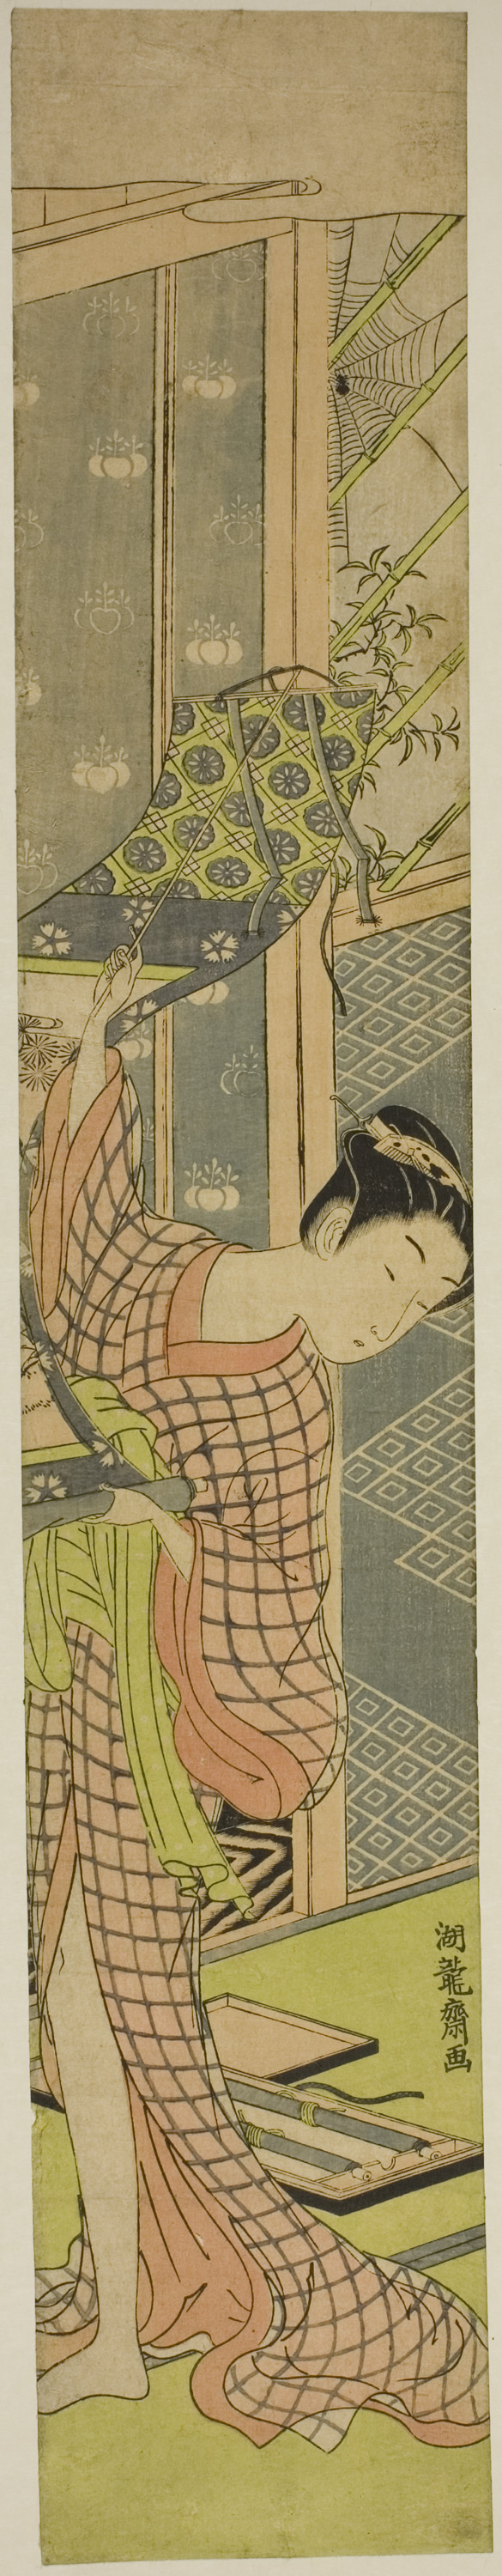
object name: Print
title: Young Woman Hanging a Painting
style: Japanese (culture or style)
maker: Isoda Koryusai (Japanese, 1735-1790)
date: c. 1771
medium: Color woodblock print; hashira-e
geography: Japan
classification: woodblock print; print; asian art